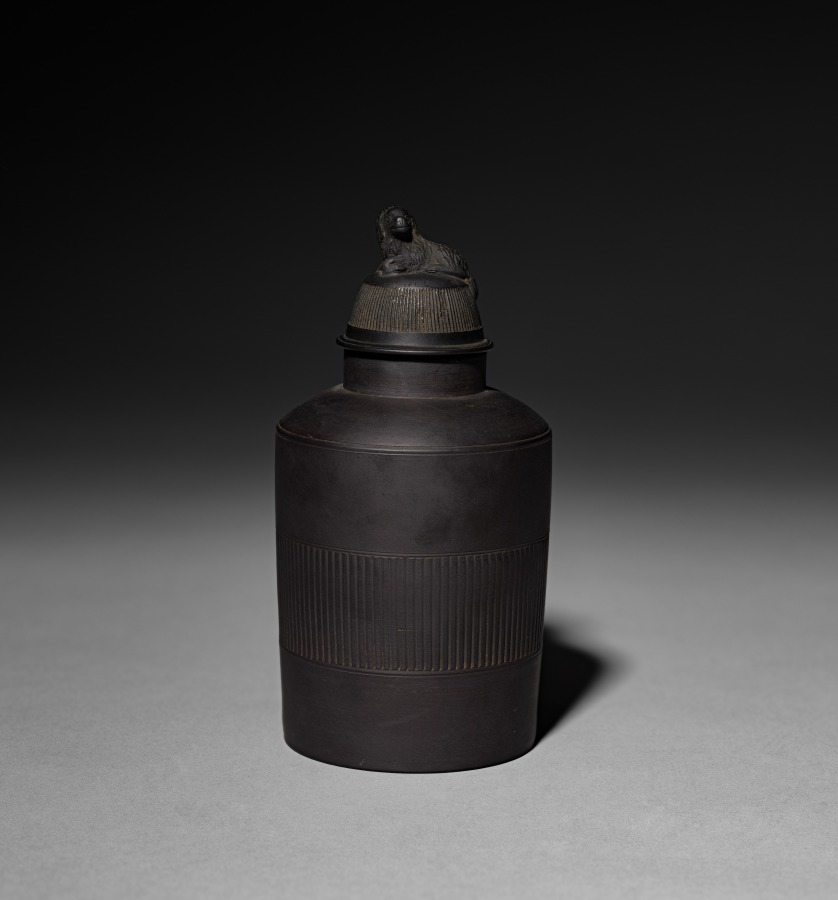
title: Tea Caddy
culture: England, Staffordshire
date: c. 1770–80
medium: Black basalt stoneware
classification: Ceramic